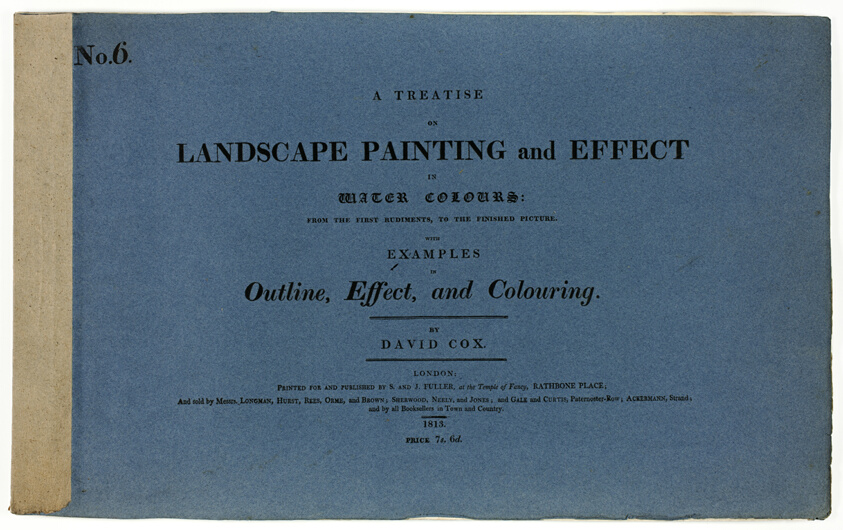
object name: Book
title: A Treatise on Landscape Painting and Effect in Water Colours: From the First Rudiments, to the Finished Picture No. 6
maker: David Cox, the elder (English, 1783-1859); engraved by Richard Reeve (English, 1780-c. 1835); published by S. and J. Fuller (English, 19th century)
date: 1813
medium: Book with four aquatints and letterpress in black on cream wove paper, in box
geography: England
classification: book; paper; prints and drawing